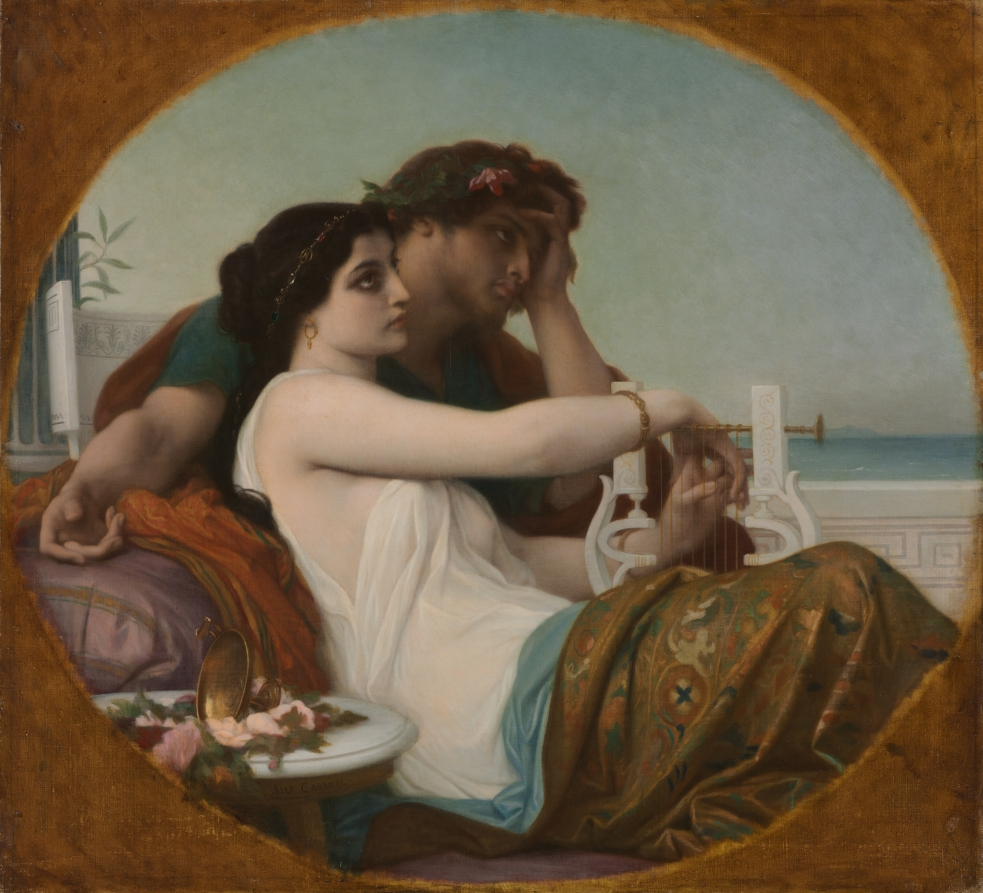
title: Aglaida and Boniface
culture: France, 19th century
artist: Alexandre Cabanel (French, 1823–1889)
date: c. 1857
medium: oil on canvas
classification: Painting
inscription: Signed lower right: "Alex Cabanel"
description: The French painter Alexandre Cabanel was a favorite of Emperor Napoleon III and a leader of the academic style that emphasized precise drawing and smoothly modeled forms. This painting depicts the wealthy Roman woman Aglaida and her concubine slave Boniface, here living as pagan sinners in Rome around 290 CE. On a trip to Tarsus on the Anatolian coast, Boniface converted to Christianity and was tortured and beheaded. Aglaida also converted to Christianity, gave all her possessions to the poor, and built a church for Boniface's relics.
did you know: Alexandre Cabanel was a leader of the academic artists who rejected the paintings of Édouard Manet and other "realists" from the Salon of 1863, producing a vast outcry that forced the government to organize the alternative Salon des Refusés.